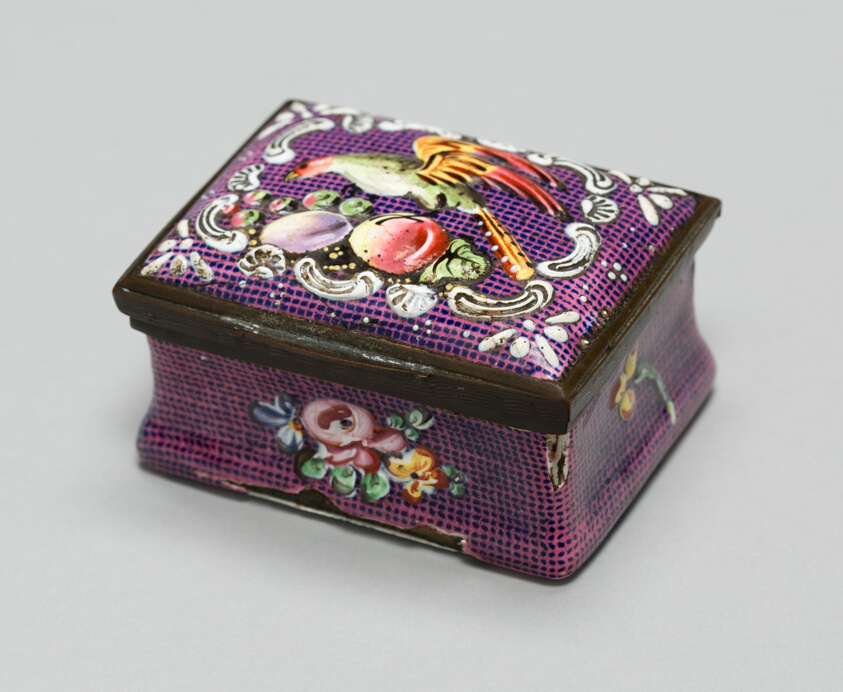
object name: Metalwork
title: Snuff Box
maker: Bilston, England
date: c. 1775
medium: Metal and enamel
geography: Bilston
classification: snuff box; enamel; metalwork